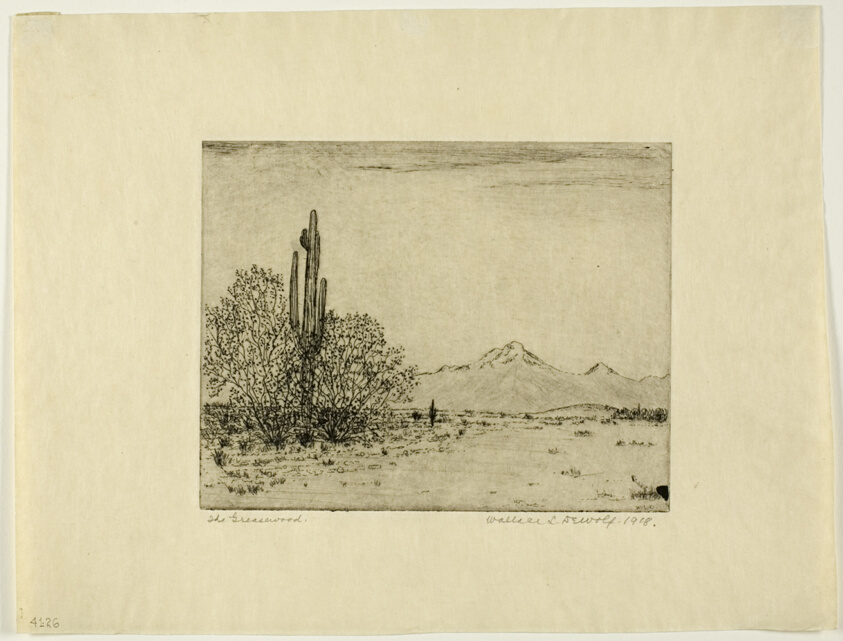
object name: Print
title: The Greasewood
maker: Wallace L. DeWolf (American, 1854-1930)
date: 1918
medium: Etching on cream wove paper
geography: United States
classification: etching; print; prints and drawing